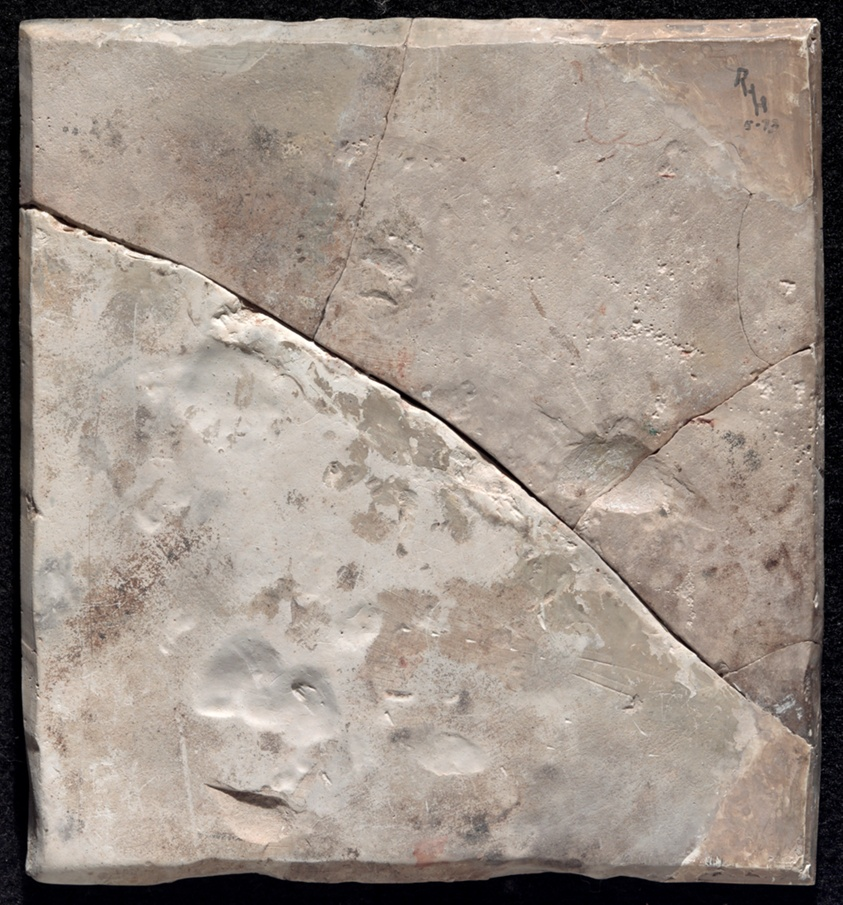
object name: Architectural fragment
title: Plaque Depicting a Queen or Goddess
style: ptolemaic, greco-roman (egyptian), ancient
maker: Egyptian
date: Ptolemaic Period (332–30 BCE)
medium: Limestone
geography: Egypt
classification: plaque (flat object); stone; sculpture; ancient art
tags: goddesses